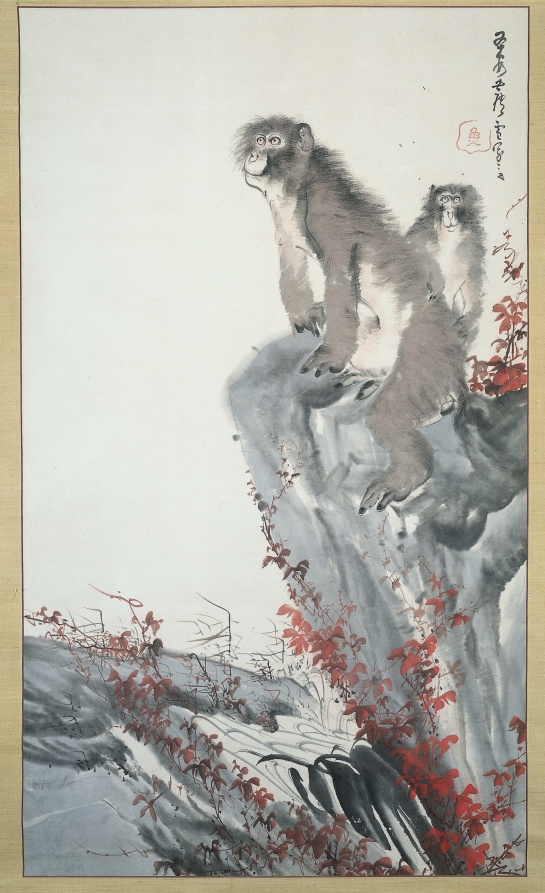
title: Monkeys by a Stream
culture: Japan, Edo period (1615–1868)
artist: Nagasawa Rosetsu (Japanese, 1754–1799)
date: c. 1796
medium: hanging scroll; ink and color on paper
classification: Painting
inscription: Inscription: 平安蘆雪寫意; Transliteration: Heian Rosetsu shai; Sealed: 魚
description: The two monkeys in this painting are Japanese macaques. The one in front dangles its left leg over a sharply angled rock, surveying the land beyond a fast-moving mountain stream. A smaller monkey sits behind it, looking directly ahead as if it realizes it is being watched. The artist used just a few highly contrasting warm and cool colors, sweeping brushstrokes over ink washes, and loose lines to create a scene that powerfully evokes the mentally engaged state of the two animals.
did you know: Monkeys, which are found throughout the mountainous and wooded areas of Japan, became a favorite subject of many later Japanese artists.